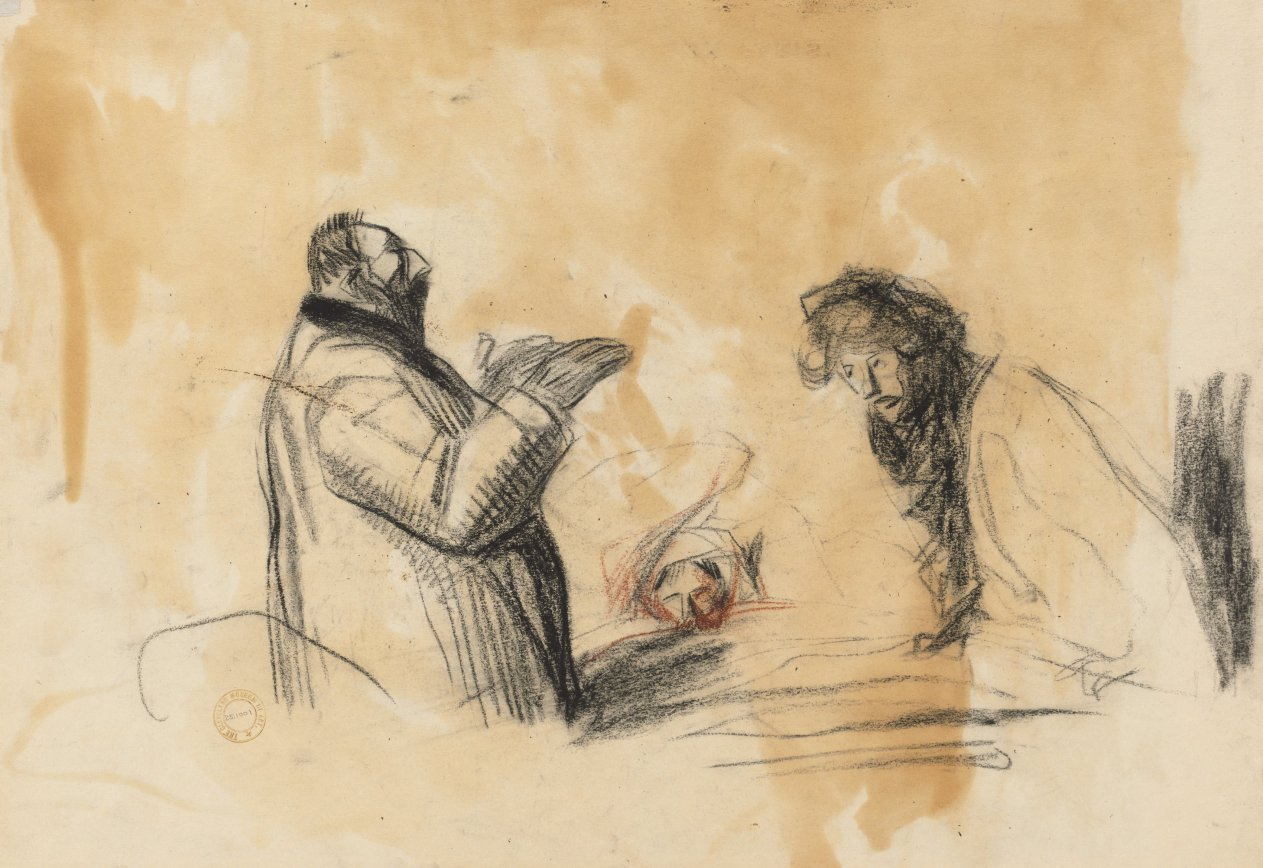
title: Sketch for In the Hospital (verso)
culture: France, late 19th-early 20th Century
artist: Jean Louis Forain (French, 1852–1931)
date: fourth quarter 1800s or first third 1900s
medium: black and red chalk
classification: Drawing